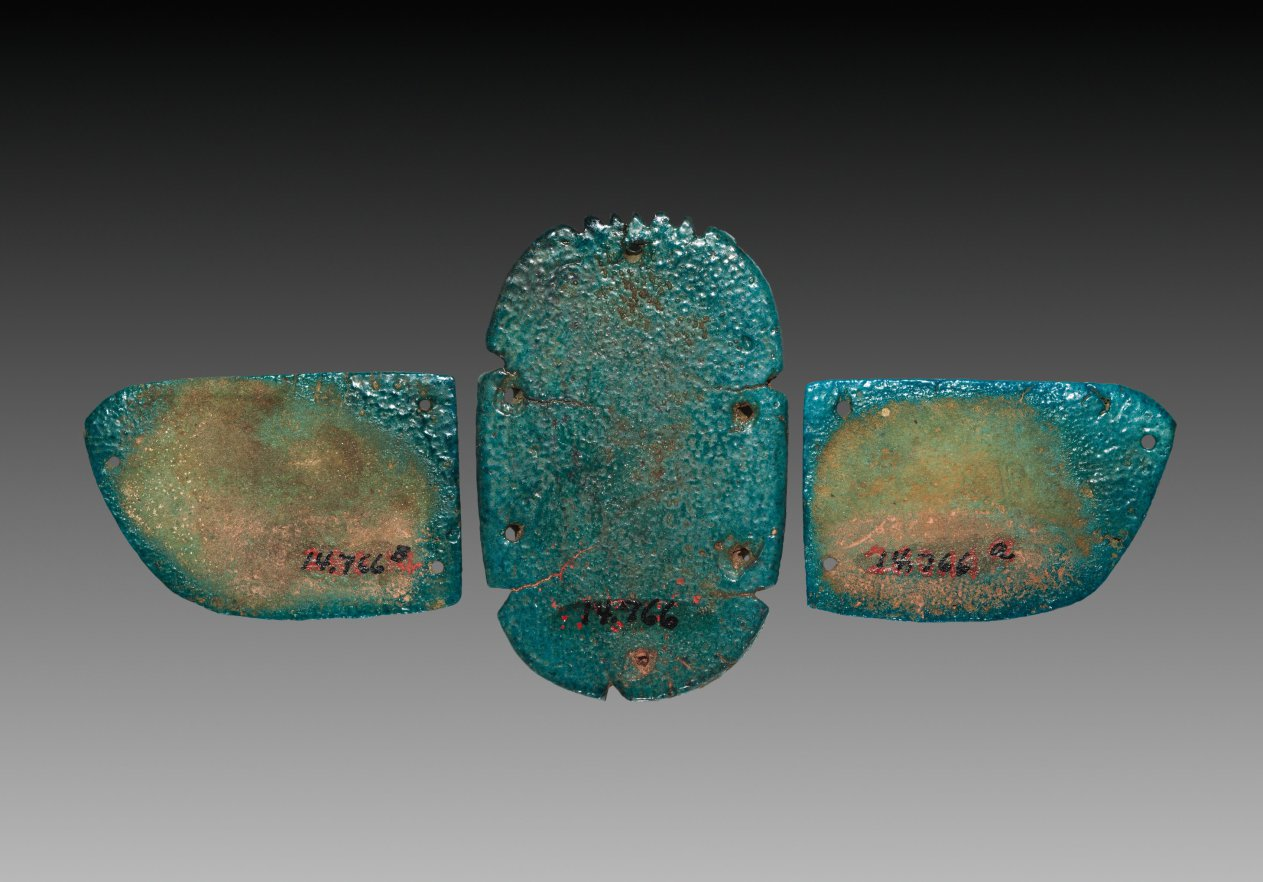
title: Winged Pectoral Scarab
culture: Egypt, Late period (715–332 BCE), Dynasty 26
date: 664–525 BCE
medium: deep turquoise faience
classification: Scarabs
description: To create connections between their work and ancient Egypt, European and American jewelers conducted careful research, looking at sources including hieroglyphs in funerary art and architecture. The1924 Cartier scarab brooch was directly inspired by representations of the dung beetle, which also stood for Khepri, a sun deity of resurrection, while the 1927 gateway brooch echoes the silhouette of ancient Egyptian temple entrances. Beauty companies like Bourjois even adopted ancient Egyptian motifs for their marketing and packaging, suggesting the elegance of their brand through sensationalized elements of ancient Egyptian art.